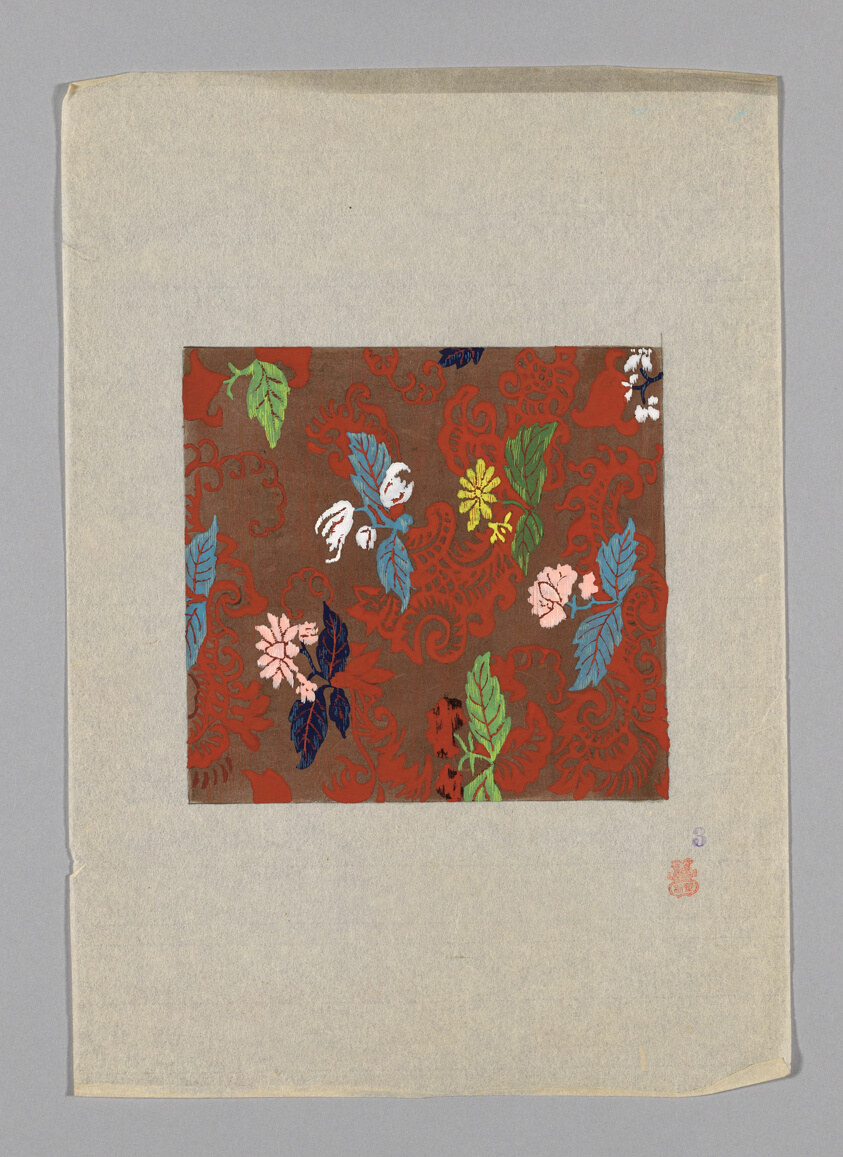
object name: Drawing and Watercolor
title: Design on Paper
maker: Japan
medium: Paper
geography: Japan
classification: textile; accessory - paper design; watercolor; paper